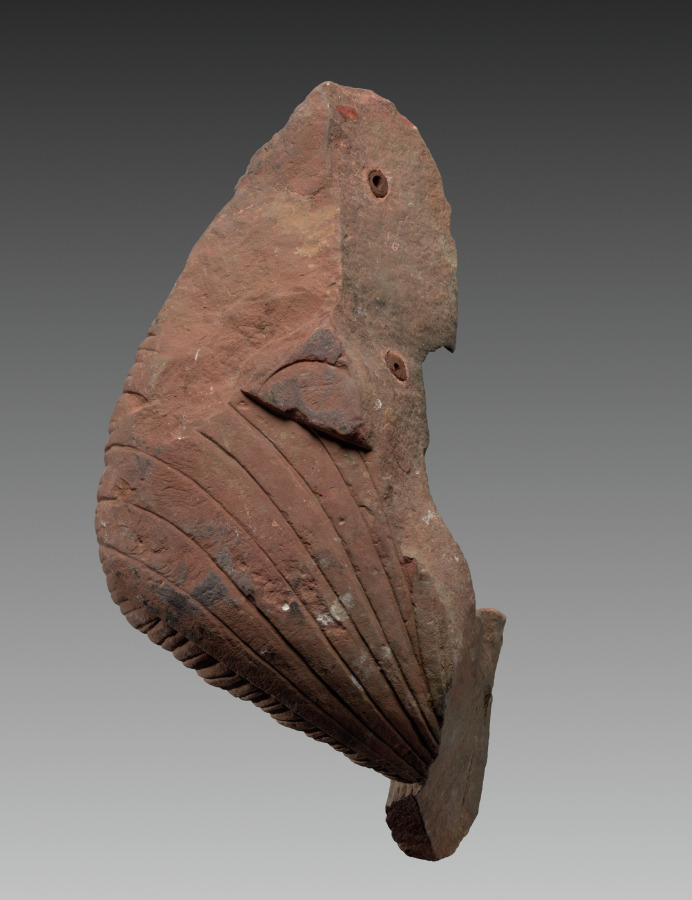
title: Arm of Buddha or Bodhisattva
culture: India, Mathura, Kushan period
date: c. 75–100 CE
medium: stone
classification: Sculpture